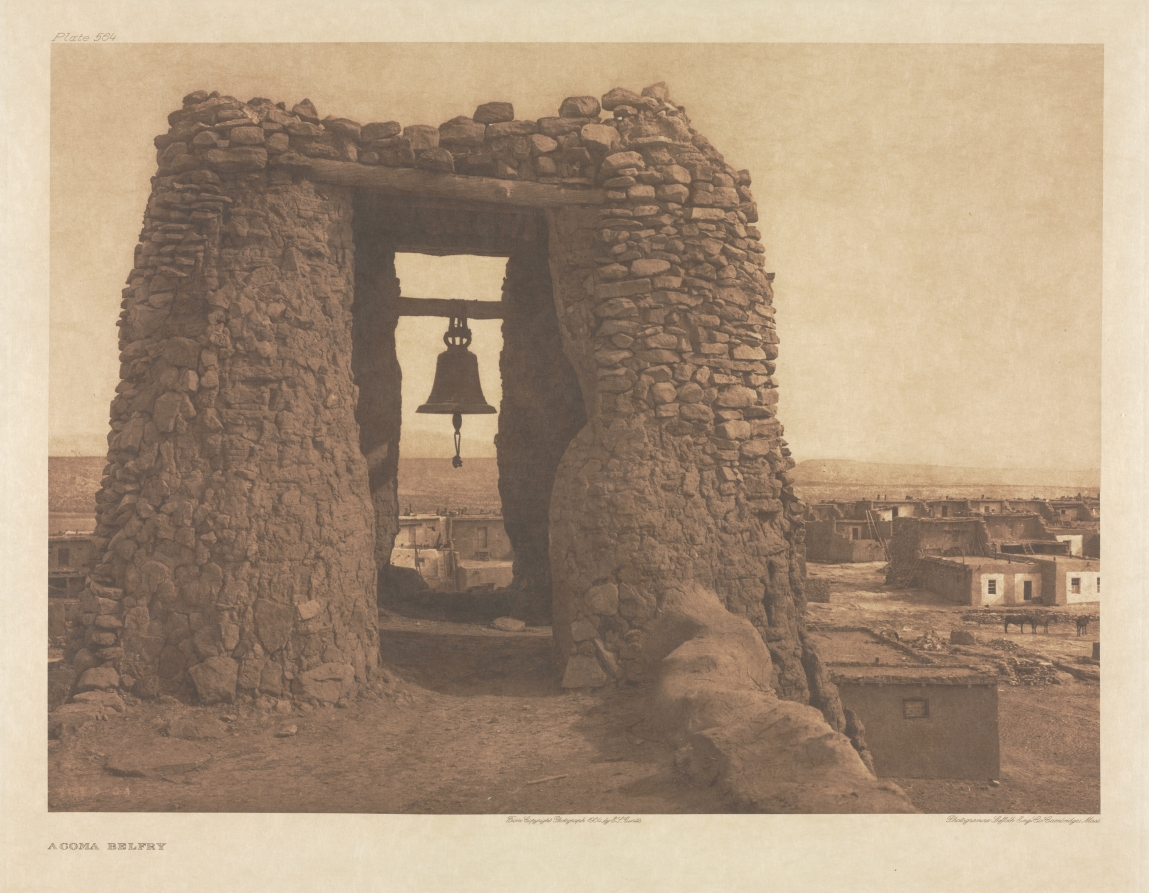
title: Portfolio XVI, Plate 564: Acoma Belfry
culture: America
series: The North American Indian: being a series of Portfolios picturing and describing the Indians of the United States, the Dominion of Canada, and Alaska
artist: Edward S. Curtis (American, 1868–1952)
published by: The University Press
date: 1904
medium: photogravure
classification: Portfolio